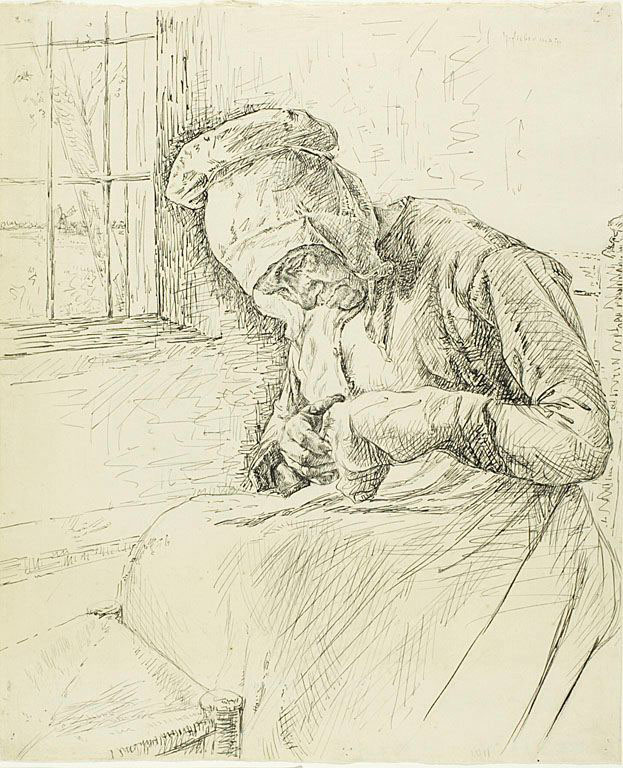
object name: Drawing and Watercolor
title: Old Woman Mending at the Window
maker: Max Liebermann (German, 1847-1935)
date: 1881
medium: Pen and black ink over graphite and blue crayon on cream laid paper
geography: Germany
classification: pen and ink drawings; drawings (visual works); prints and drawing